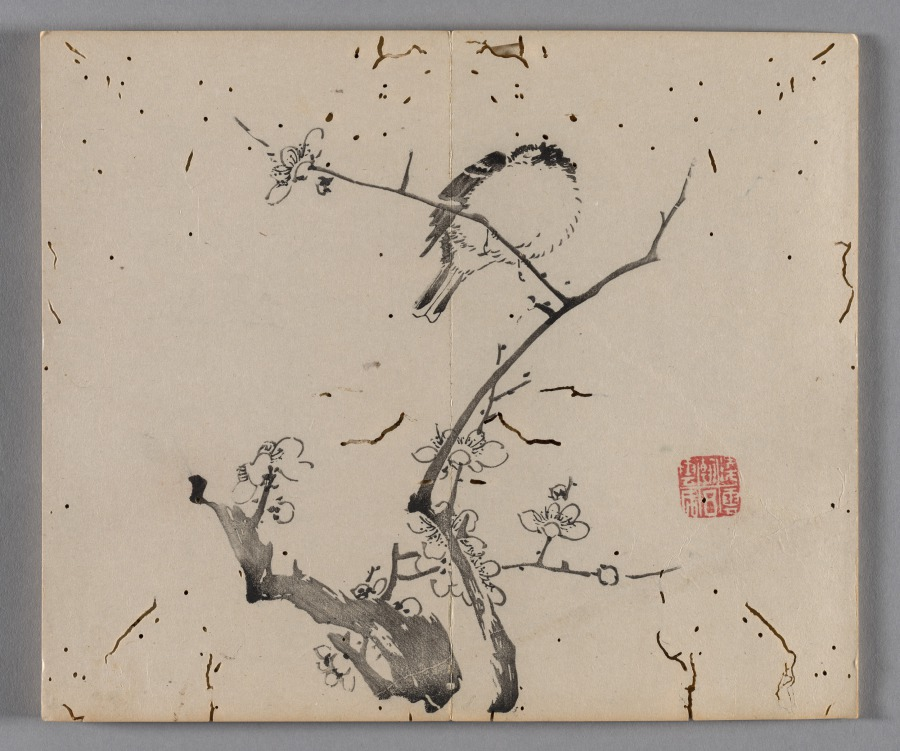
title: Ten Bamboo Studio Painting and Calligraphy Handbook (Shizhuzhai shuhua pu): Birds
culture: China, Qing dynasty (1644-1911)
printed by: Hu Zhengyan (Chinese, c. 1584–1674)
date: 1633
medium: Woodblock-printed book; ink and colors on paper; first edition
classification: Print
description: Color printing reached a level of perfection in the early 1600s, as seen in this Ten Bamboo Studio Collection of Calligraphy and Painting and the Mustard Seed Garden Manual of Painting (printed 1679 and 1701). The painterly quality, precision in registering (aligning) the woodblocks, and harmonious colors made them the most successful color print editions in Chinese history. Both editions were printed and compiled in Nanjing, spread nationwide, and had a great impact on the arts in Japan and Korea.